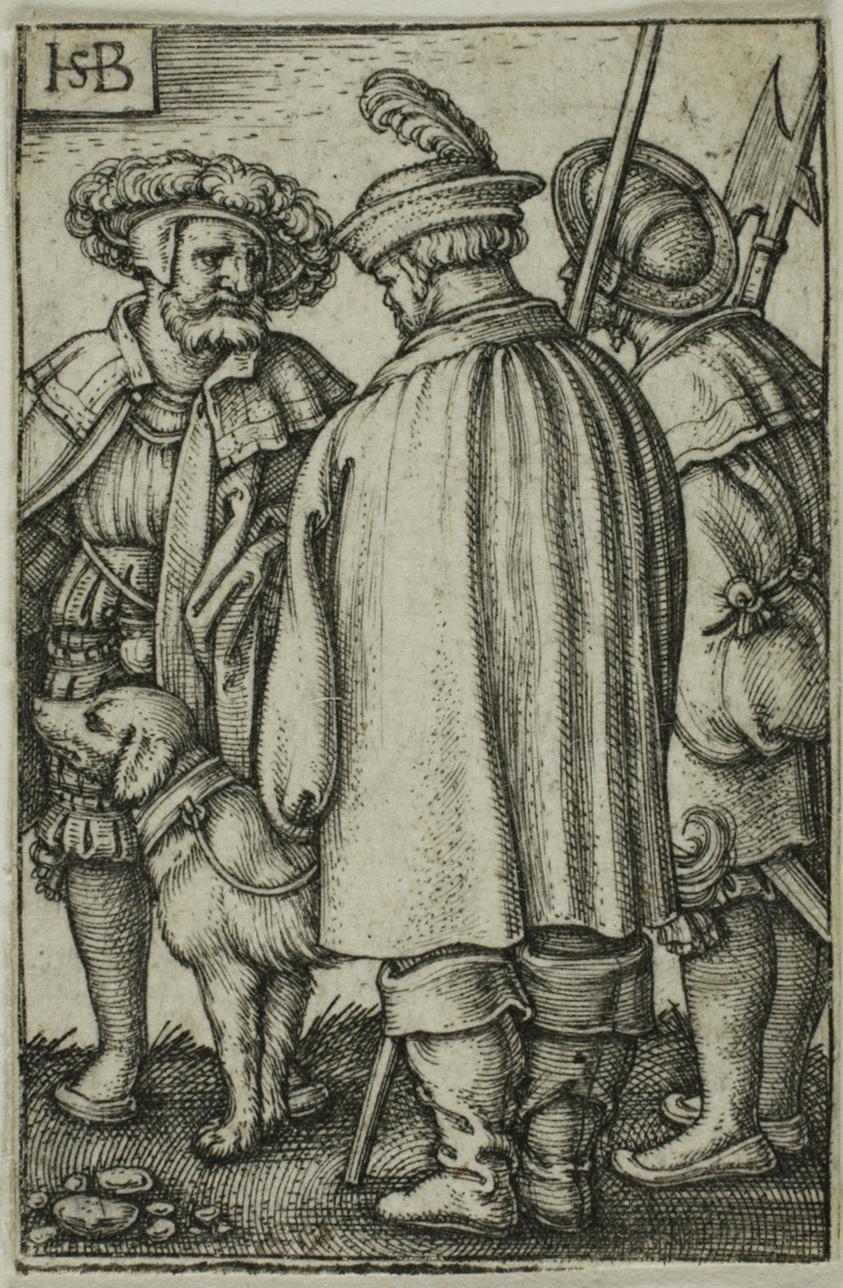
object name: Print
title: Three Soldiers and a Dog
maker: Sebald Beham; German, 1500-1550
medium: Engraving in black on ivory laid paper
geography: Germany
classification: engraving; print; prints and drawing